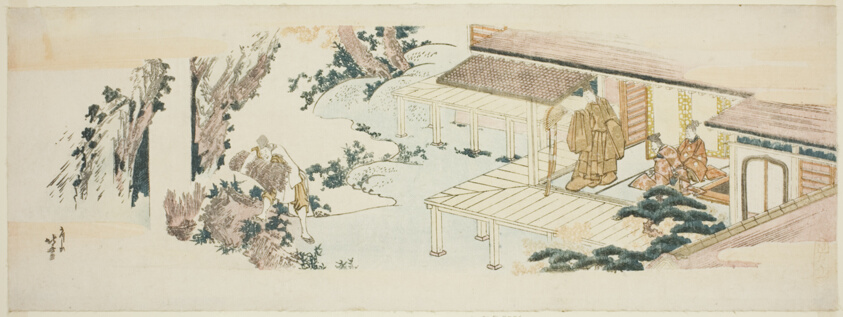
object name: Print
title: Servant throwing bundles of branches into waterfall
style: Japanese (culture or style)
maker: Katsushika Hokusai 葛飾 北斎; Japanese, 1760-1849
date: c. 1810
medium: Color woodblock print; ebangire, surimono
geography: Japan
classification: woodblock print; print; asian art